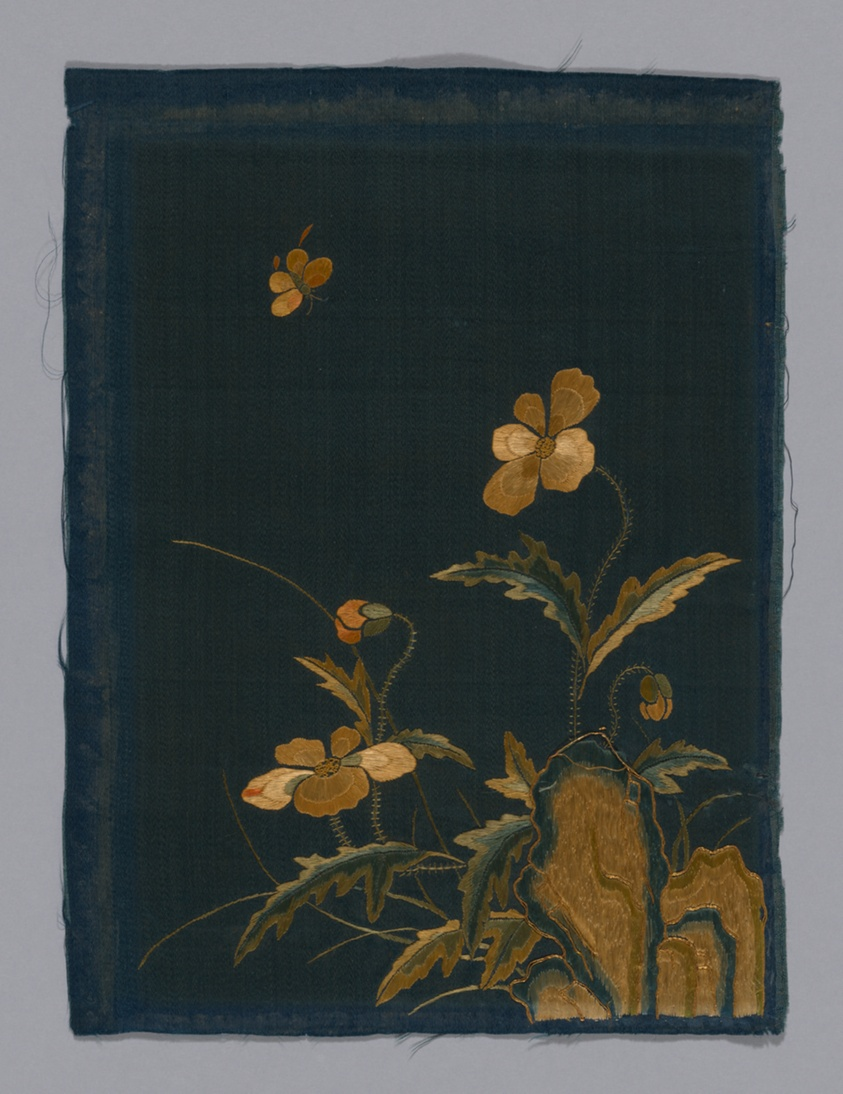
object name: Textile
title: Panel (Furnishing Fabric)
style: kangxi, qing, East Asian, Chinese (culture or style), asian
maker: China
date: Kangxi Period, Qing dynasty (1644–1911), 1800/50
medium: One of four panels. Of dark green satin embroidered in colored silks. Has two panels of figures and one of flowers. Borders of modern red cloth with design of fret in couched gold cord.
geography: China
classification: needlework (visual works); weaving; textile; furnishing textile